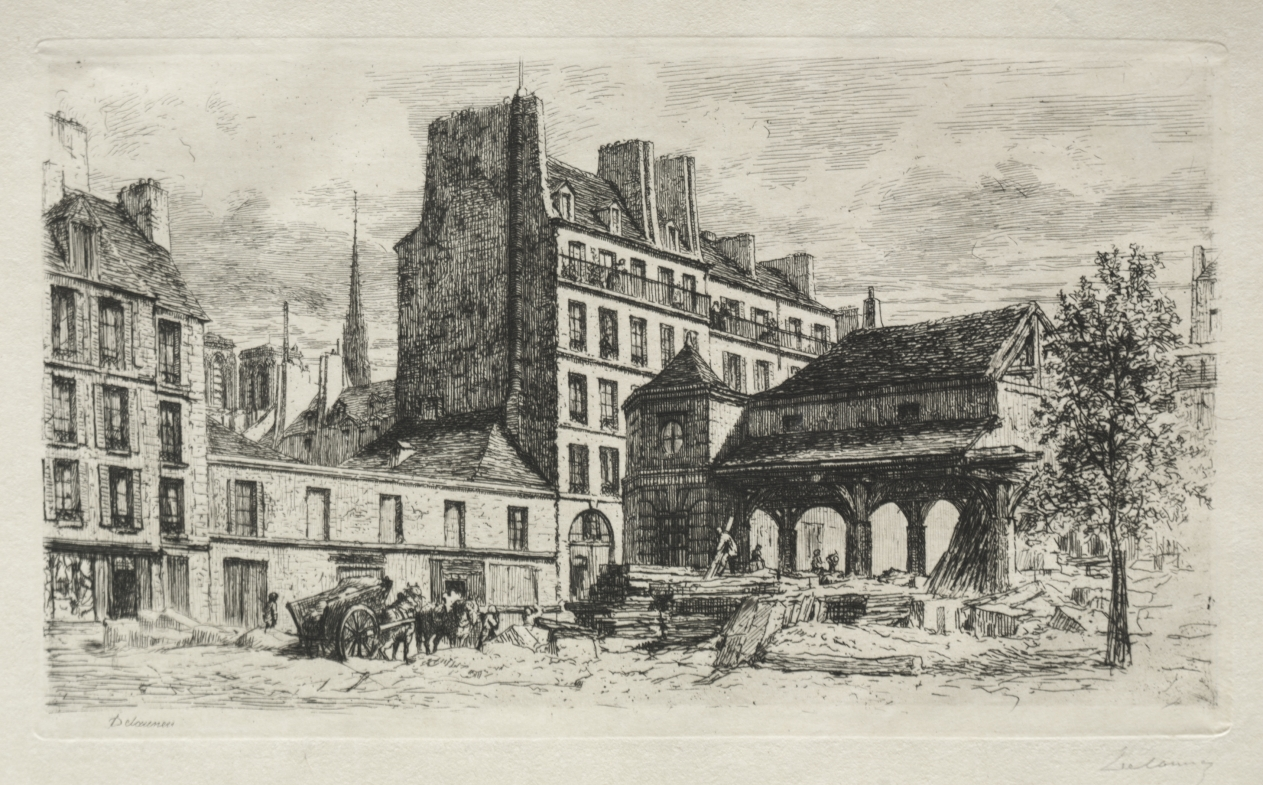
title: Marché aux veaux en demolition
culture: France, 19th century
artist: Alfred Alexandre Delauney (French, 1830–1894)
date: c. 1870–94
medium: etching and drypoint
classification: Print